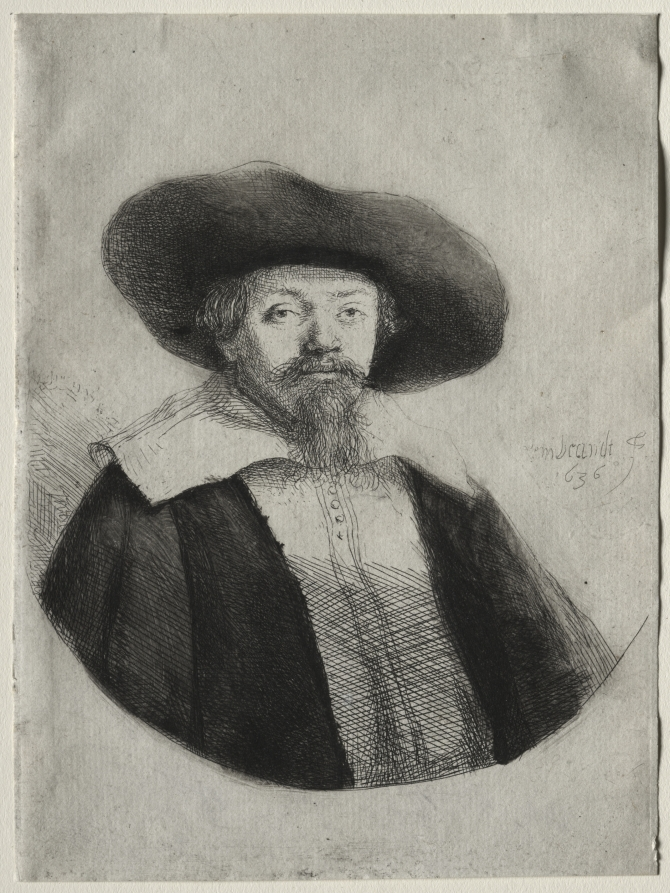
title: Samuel Manasseh Ben Israel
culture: Netherlands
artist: Rembrandt van Rijn (Dutch, 1606–1669)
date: 1636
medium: etching with surface tone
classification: Print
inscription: center right, in plate: Rembrandt f. / 1636 ; lower left, in graphite: B 269 ; lower center, in graphite (erased): [illegible] ; lower right, in graphite: 269 II